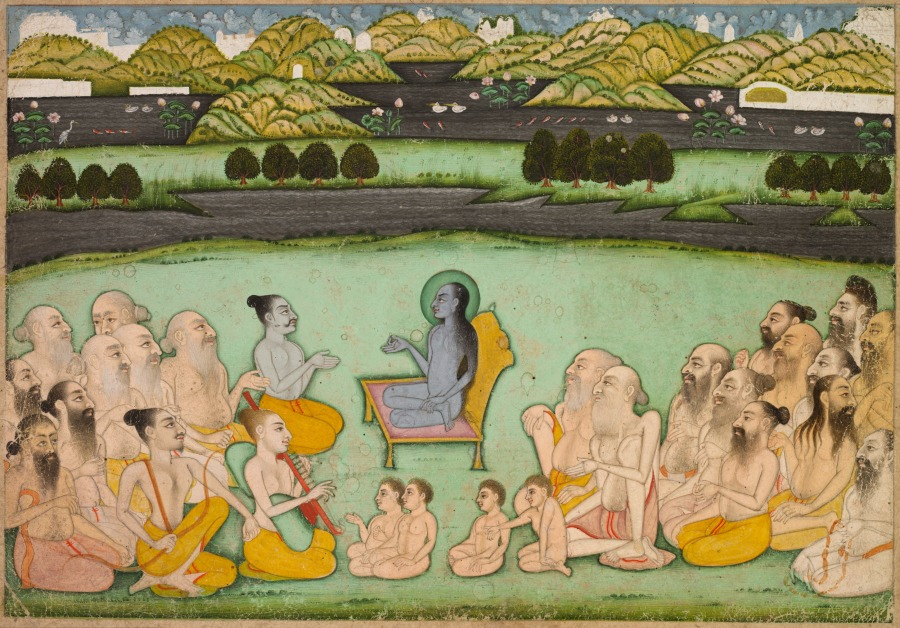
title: Hindu God Krishna Talking to Elders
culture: India, Rajasthan, Kishangarh school, early 19th Century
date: c. 1800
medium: Gum tempera and ink on paper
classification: Painting